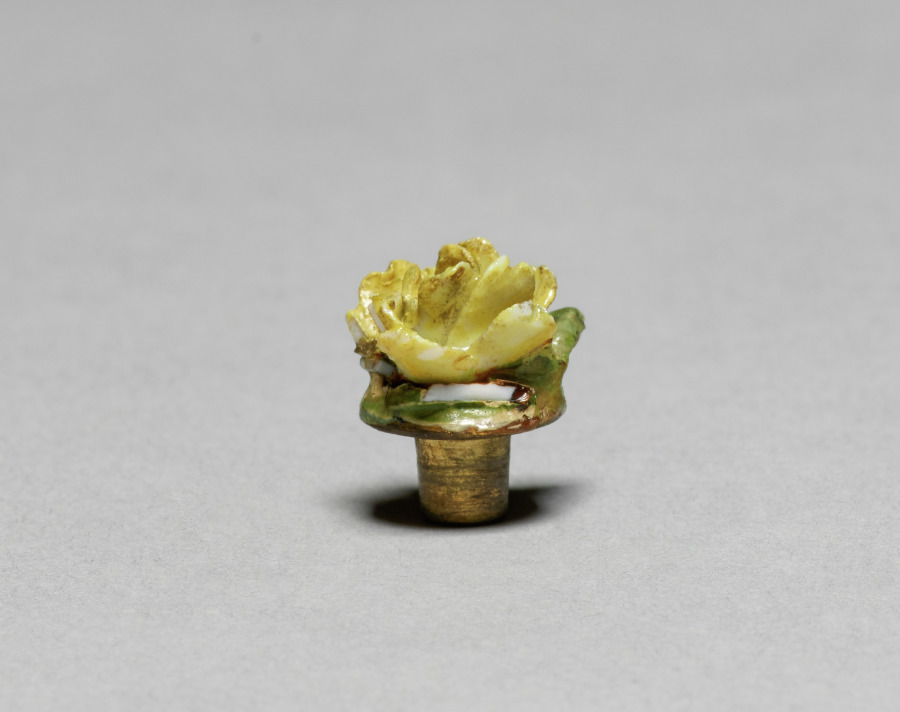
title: Stopper for a Scent Bottle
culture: Germany, Meissen, 19th century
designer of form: manner of Meissen Porcelain Factory (German, est. c. 1710)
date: 1800s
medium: porcelain with gilt metal mounts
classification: Miscellaneous